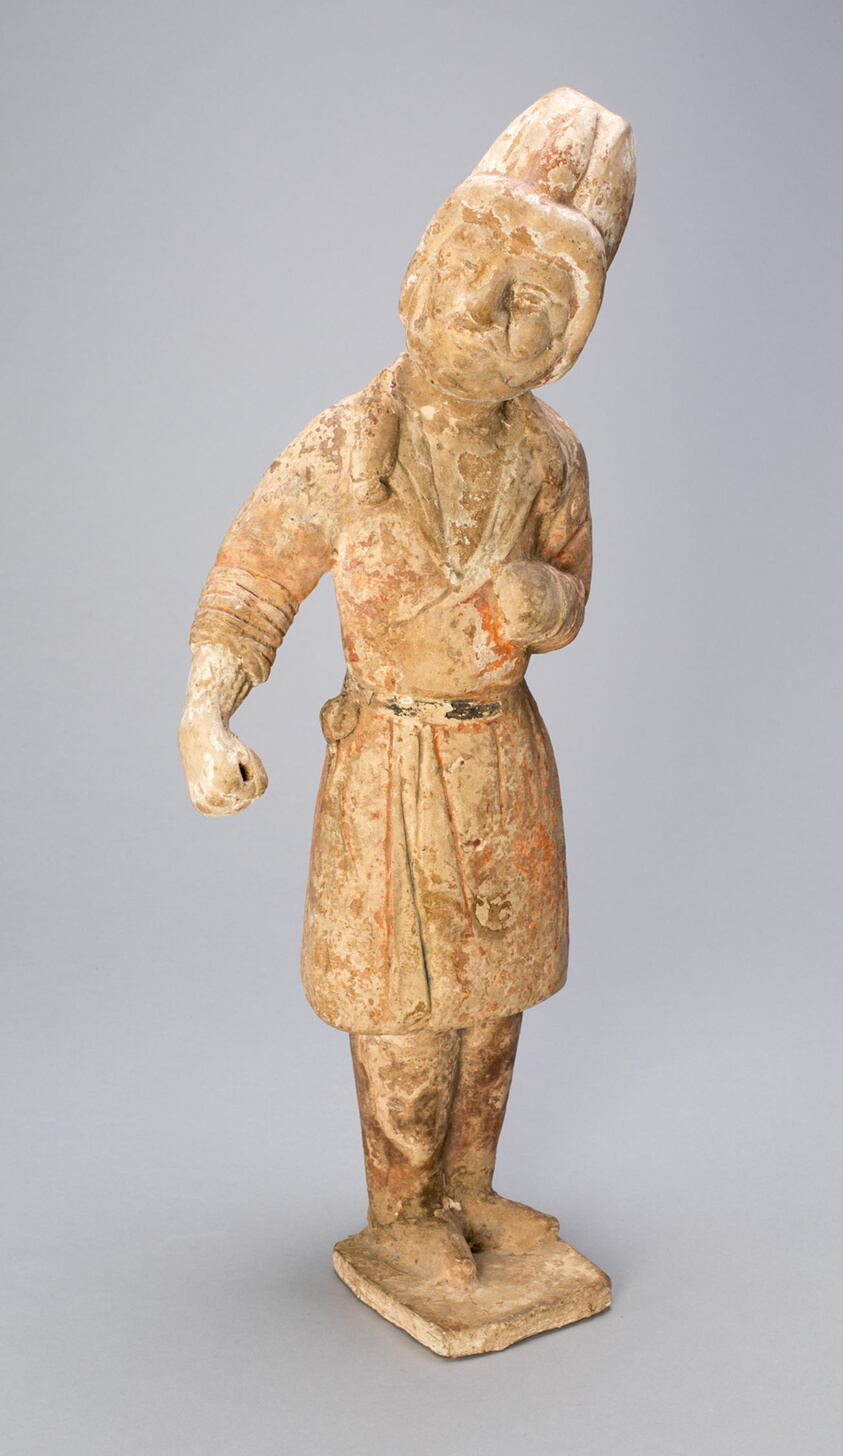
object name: Sculpture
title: Horse Groom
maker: China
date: Tang dynasty (618–906)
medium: Earthenware with traces of pigment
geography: China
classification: ceramics; asian art